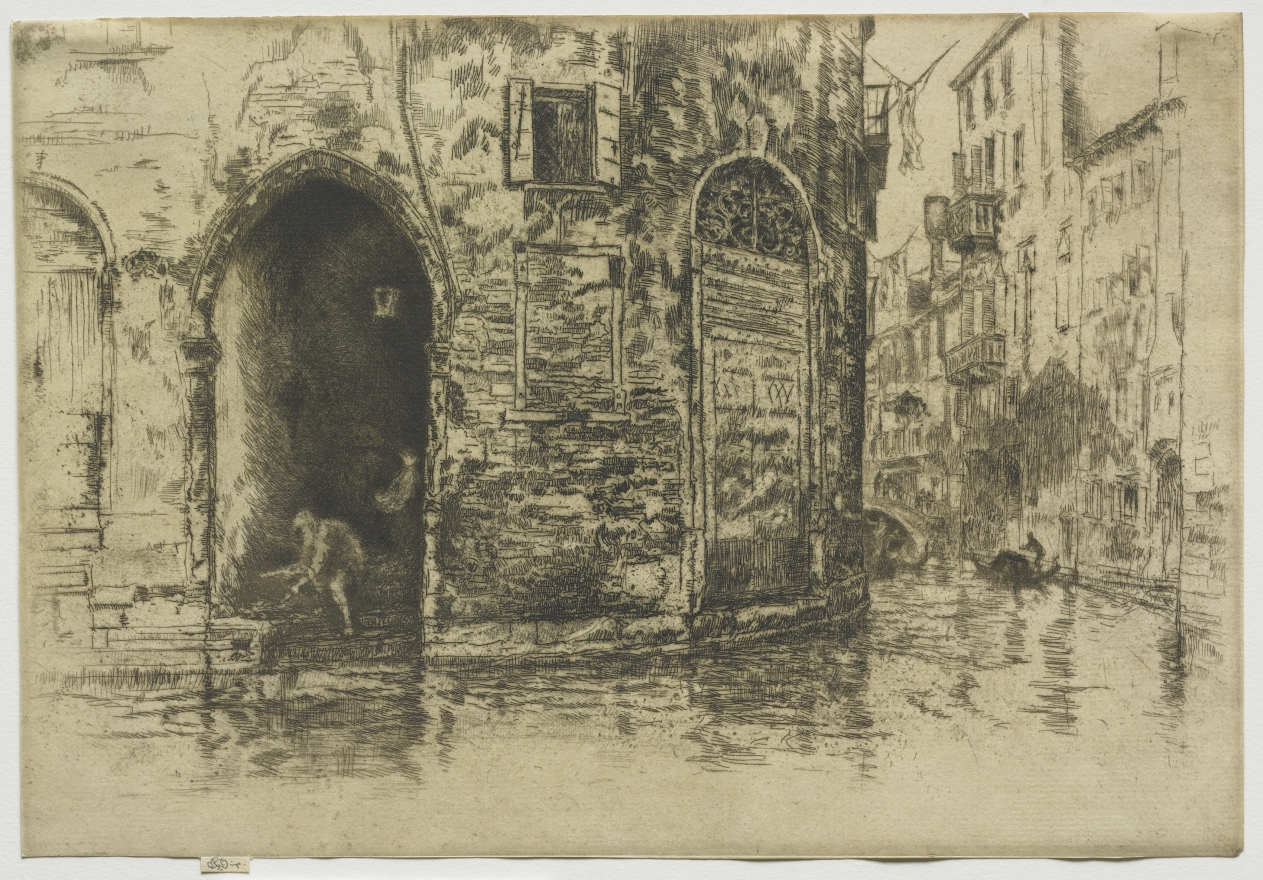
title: Two Doorways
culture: America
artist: James McNeill Whistler (American, 1834–1903)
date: 1880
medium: etching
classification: Print